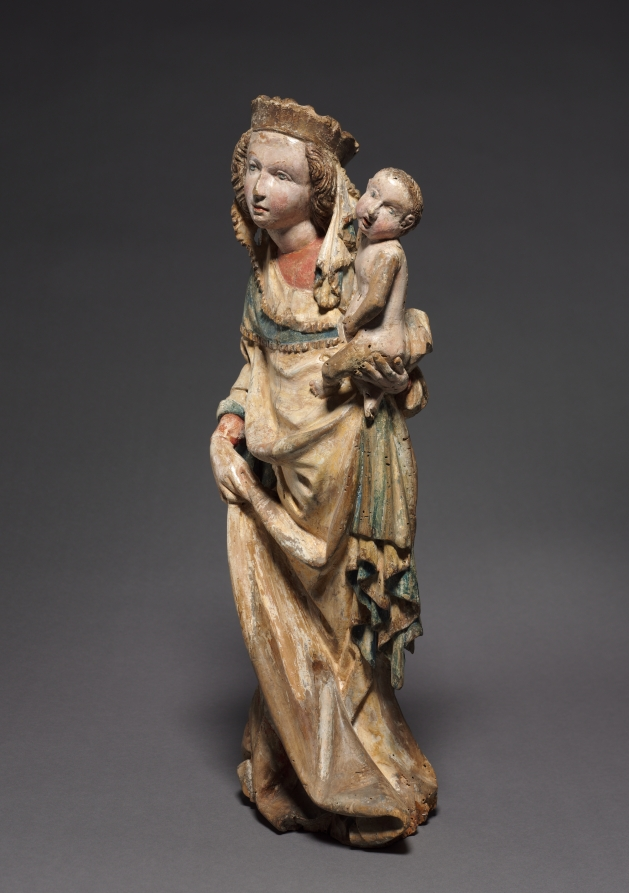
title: Madonna and Child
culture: Bohemia, vicinity of Freistadt, 15th century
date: c. 1400–1410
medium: lindenwood with polychromy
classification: Sculpture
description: This sculpture belongs to a type known as a Schöne Madonna or "Beautiful Virgin," popularized in central Europe during the late 1300s and early 1400s. The Virgin’s stance adheres to an S-curve as she stands with one leg straight and the other slightly bent at the knee. Her body is hidden beneath long, voluminous, draping garments. These so-called Beautiful Madonnas are among the most popular creations of Bohemian art and were in high demand for churches and private veneration.